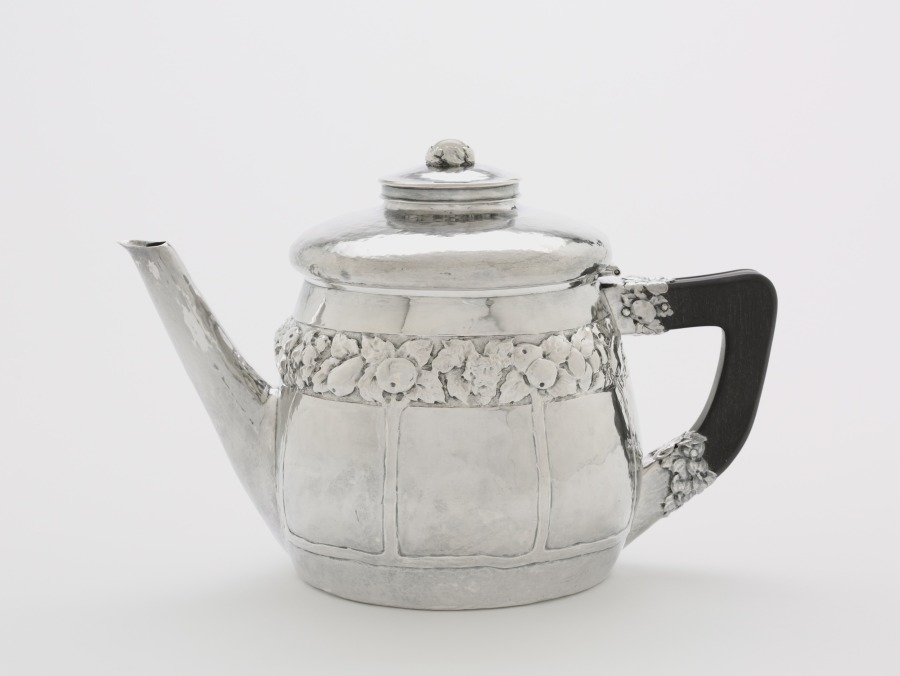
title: Teapot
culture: America, Ohio, Cleveland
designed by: Louis Rorimer (American, 1872–1939)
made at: and Rokesley Shop (American)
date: c. 1910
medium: silver, moonstones, ebony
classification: Silver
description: This tea and coffee service was designed for production by the Rokesley Shop, a collaborative group working at Louis Rorimer’s studio. Reacting against industrial mass production, Rorimer emphasized inventive design in finely crafted objects.